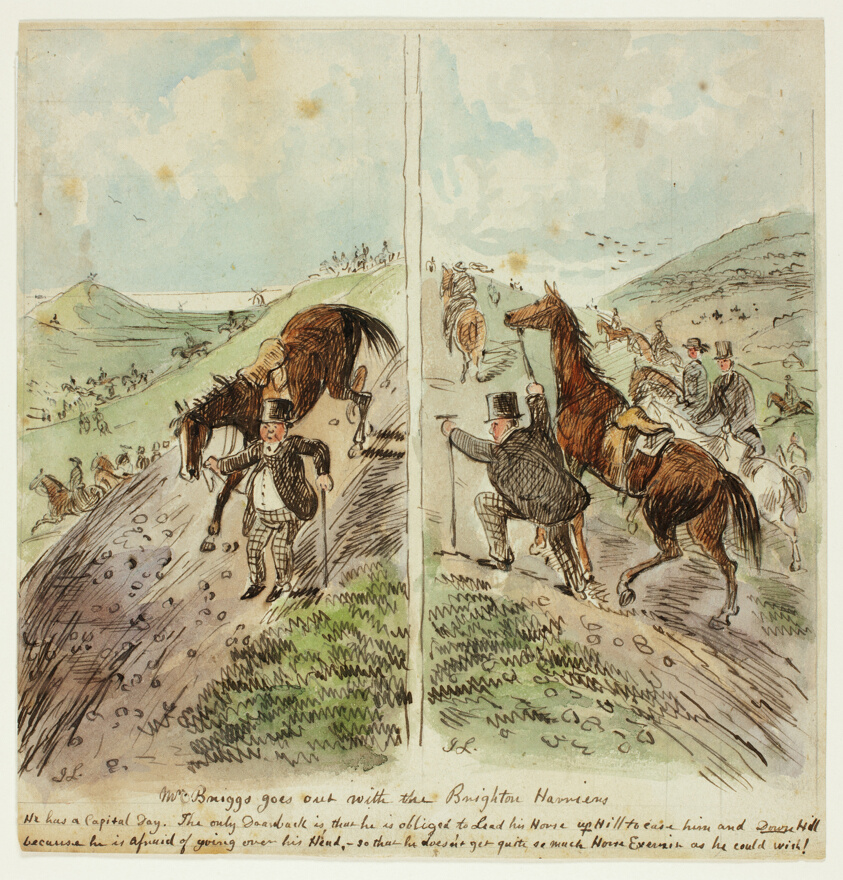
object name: Drawing and Watercolor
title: Mr. Briggs Goes Out with the Brighton Harriers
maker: John Leech (or possibly after); English, 1817-1864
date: 1850/59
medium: Watercolor and pen and brown ink, over graphite, on cream wove paper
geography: England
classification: watercolor; drawings (visual works); prints and drawing